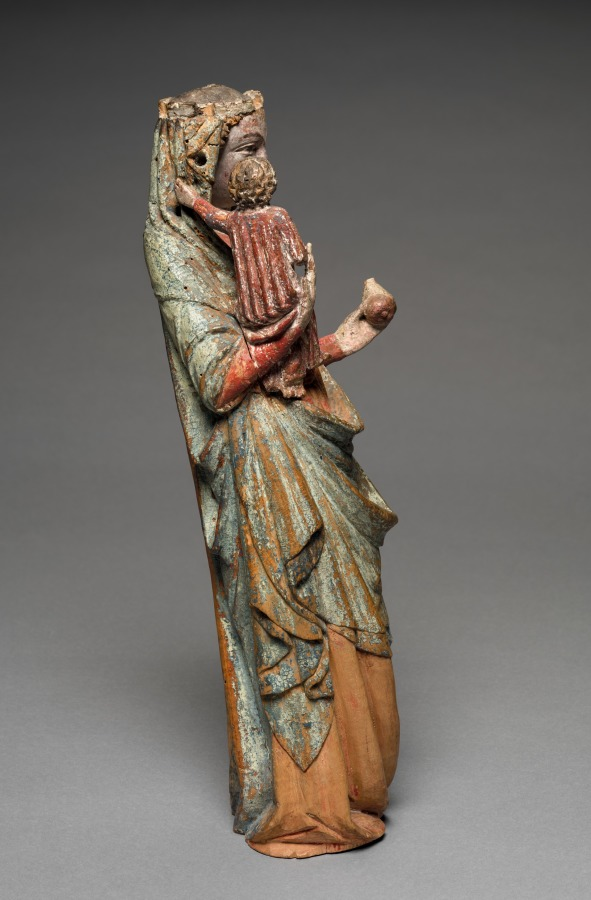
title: Reliquary Statuette of the Virgin and Child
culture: Austria, Salzburg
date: c. 1330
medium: painted lindenwood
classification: Sculpture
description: A small rectangular cavity in the back of this sculpture reveals that it was originally made to serve as a reliquary (a container for relics). In her left hand the Virgin holds a pear, a symbol of the peace and love of Christ.